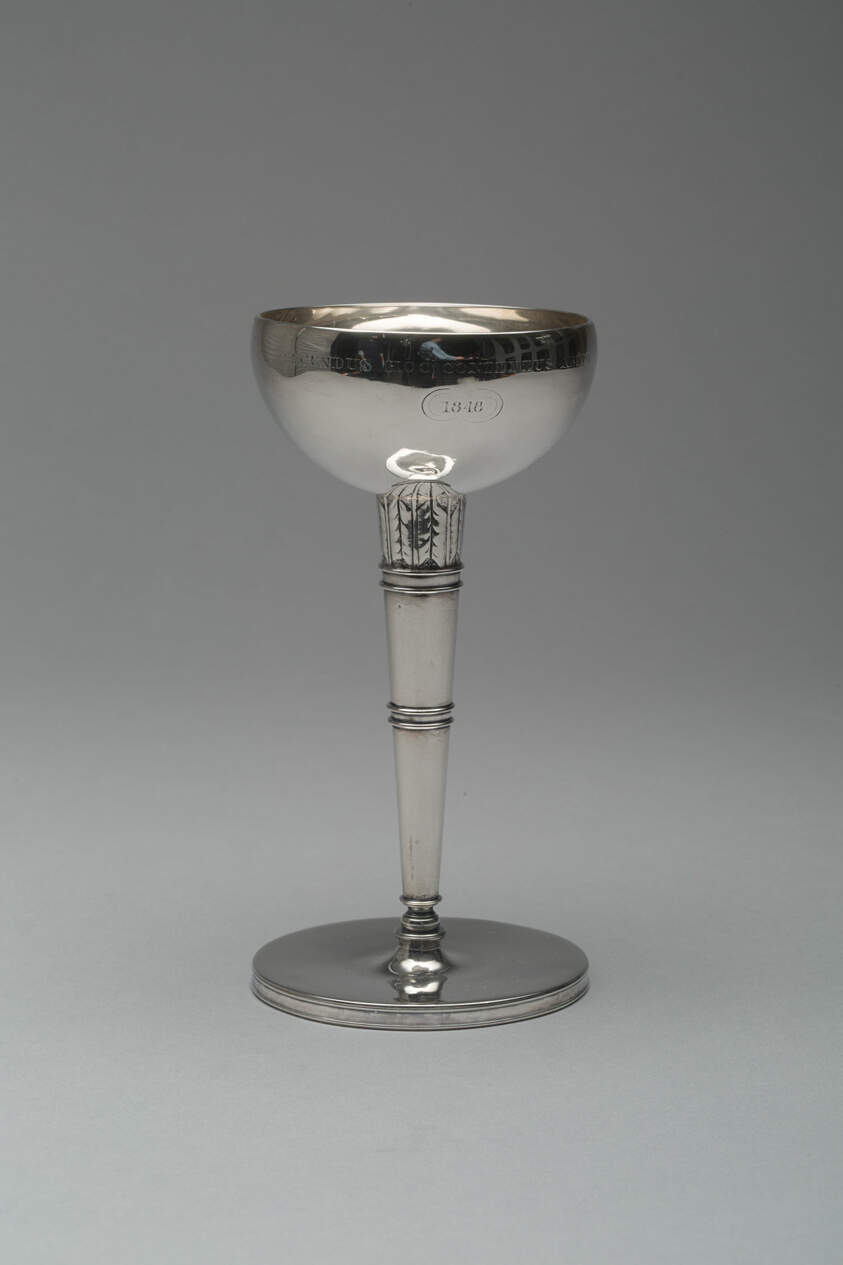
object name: Metalwork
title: Goblet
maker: Attributed to James M. Bennett; American, active 1838–1848; Philadelphia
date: 1848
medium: Silver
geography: Philadelphia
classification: silver; american decorative arts; american arts; decorative arts